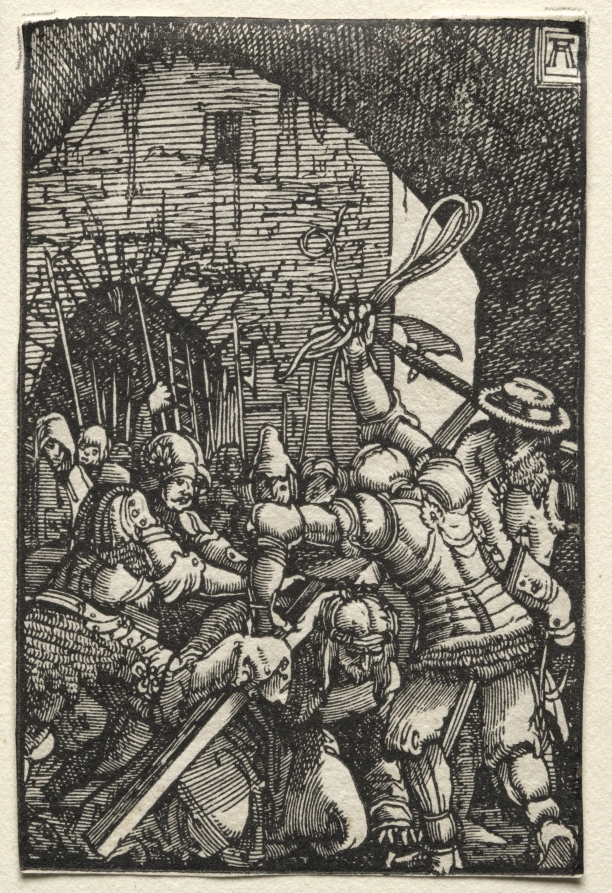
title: The Fall and Redemption of Man: Christ Bearing the Cross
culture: Germany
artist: Albrecht Altdorfer (German, c. 1480–1538)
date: c. 1515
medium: woodcut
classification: Print